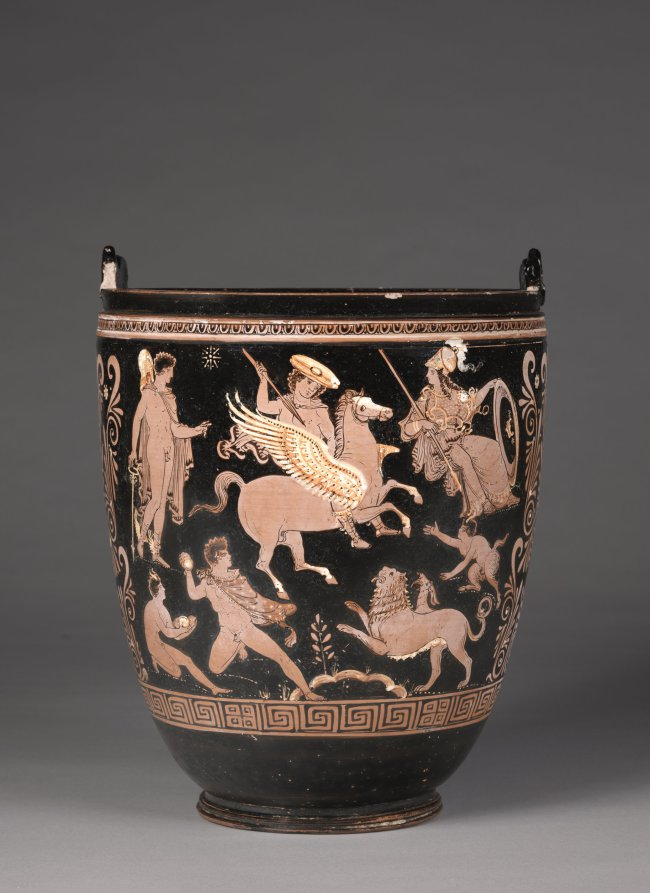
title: Red-Figure Situla (Deep Bucket): Bellerophon Slaying Chimaera (A); Dionysos, Maenads, Eros (B)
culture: South Italian, Apulian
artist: attributed to Group of the Dublin Situlae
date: c. 350 BCE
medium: ceramic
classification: Ceramic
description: The dramatic scene on this bucket-like vessel (known as a situla, more common in bronze) shows the hero Bellerophon astride his winged horse Pegasos, taking aim with a spear at the monstrous Chimaera. Combining parts of a goat and snake with the body of a lion, this fearsome fire-breathing creature lived in Lycia (now southwest Turkey), where fire still burns from natural vents in the rock. Also present on the vase are Hermes and Athena, watching Bellerophon, as well as a small Pan and two young satyrs with stones. Are they taking aim at Pegasos or the Chimaera? Dionysos, Eros, and two maenads appear on the reverse.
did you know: The mythical fire-breathing Chimaera comprises a lion with goat’s head and neck, plus a snake-headed tail.